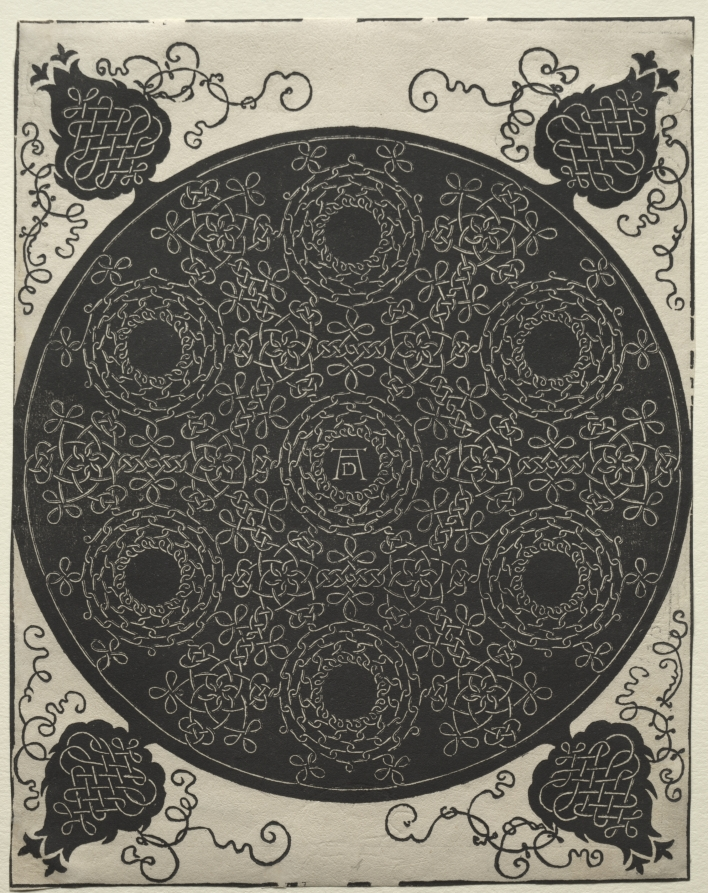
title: Fourth Knot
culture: Germany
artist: Albrecht Dürer (German, 1471–1528)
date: c. 1506–7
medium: woodcut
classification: Print